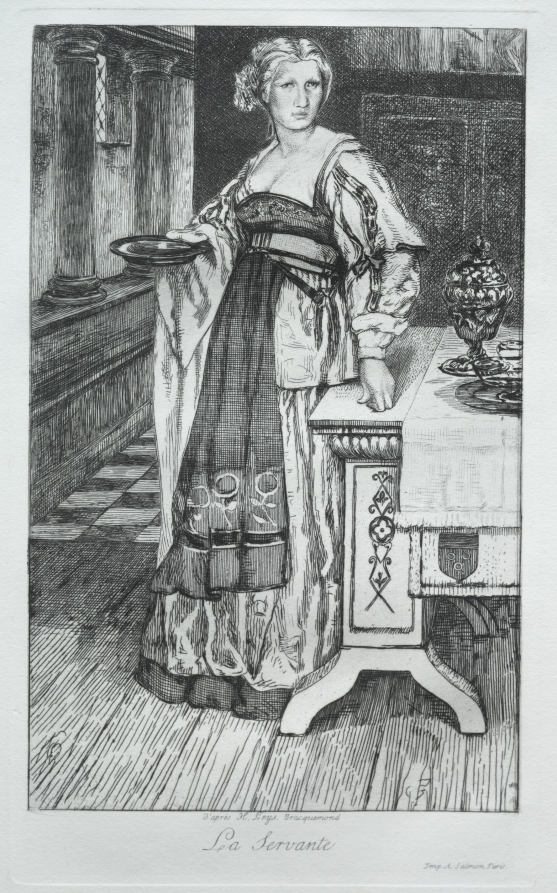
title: The Maidservant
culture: France, 19th century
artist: Félix Bracquemond (French, 1833–1914)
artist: after Henri Leys (Belgian, 1815–1869)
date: 1868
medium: etching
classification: Print